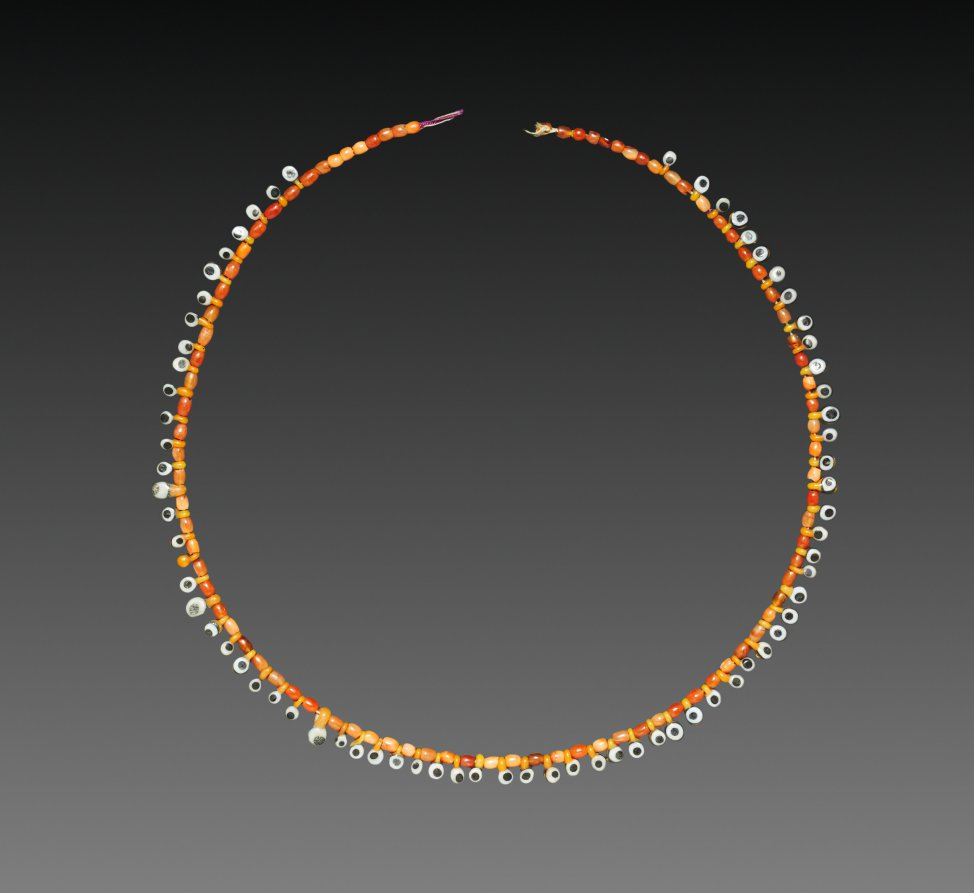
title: Necklace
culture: Egypt, Middle Kingdom, Dynasty 12 (barrel beads) and New Kingdom, Dynasty 19 (eye beads)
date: barrel beads: 1980–1801 BCE; eye beads: 1295–1186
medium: glass and carnelian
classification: Jewelry